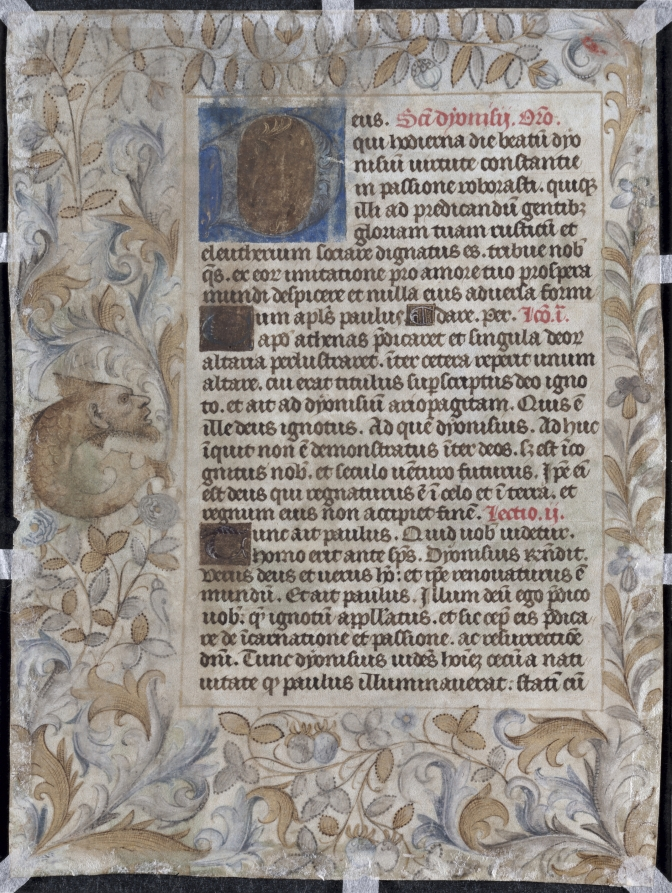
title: Leaf Excised from a Breviary of Charles the Bold and Margaret of York: The Martyrdom of Saint Denis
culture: France, Valenciennes, 15th century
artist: Simon Marmion (French, 1420s-1489)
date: c. 1467–70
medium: tempera on vellum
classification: Manuscript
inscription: Recto (none); verso (27 lines of written text in textura)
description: Simon Marmion was one of the most esteemed miniaturists of his generation. He was praised by the poet Jean Lemaire de Belges as the "prince of illumination." Marmion was a member of a family of painters from Amiens and likely trained in his father’s workshop before establishing his own workshop in Valenciennes. During the course of his career, he received numerous commissions from the Burgundian court, then resident in the Netherlands. In addition to manuscript illuminations, his commissions included paintings, altarpieces, portraits, and decorations for court festivities. This miniature comes from a deluxe breviary commissioned by the third duke of Burgundy, Philip the Good (r. 1419–67), but completed after his death for his son and successor, Charles the Bold (r. 1467–77), and his wife, Margaret of York. It survives with a sister leaf representing the Holy Virgins, now in the Metropolitan Museum of Art in New York. These two leaves are today the sole tangible remnants from a breviary that was well-documented in its time. It once contained 624 folios, 95 full-page miniatures, 12 calendar vignettes, and several thousand small initials and marginal decoration.